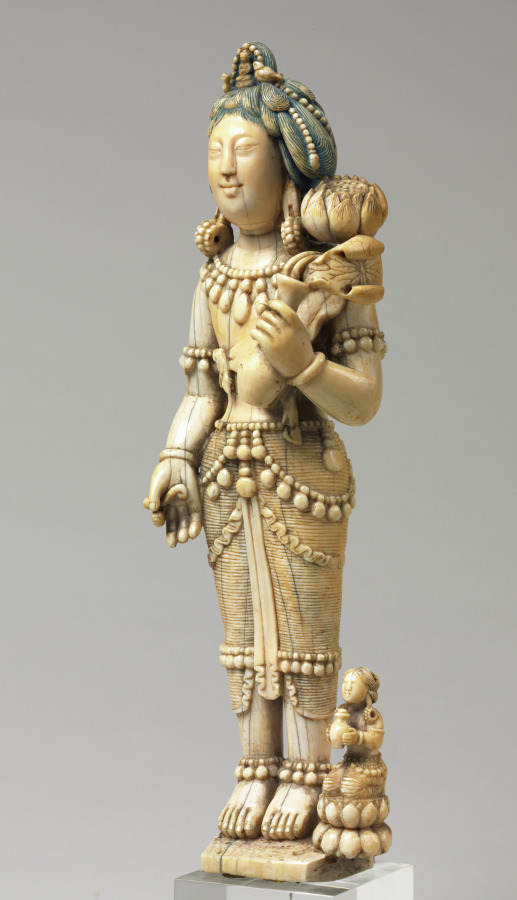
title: Bodhisattva of Compassion (Avalokiteshvara)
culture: Tibet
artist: Choying Dorje, the Tenth Black Hat Karmapa (Tibetan, 1604–1674)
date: 1647–48 or 1658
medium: ivory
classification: Ivory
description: Choying Dorje was one of the most influential monastic leaders in the history of Tibetan Buddhism. Known as the Tenth Karmapa, he was the head of the Karma Kagyu order of monks. His biographies state that from a young age he had a talent and passion for carving and painting images of bodhisattvas and other enlightened beings. Several of his original works survive, including this exceptionally rare ivory carving of Avalokiteshvara holding a lotus. Stylistically it is related to images from southwestern China, where he stayed in exile from 1647 to 1648 in the wake of Mongol invasions that destroyed many Kagyu monasteries in Tibet. While there he was exposed to Chinese art, which was favored by his patrons. The face has the distinctive elongation unique to Dorje's personal style. This sculpture could have been made during his time of exile or a decade later after his return to Tibet.